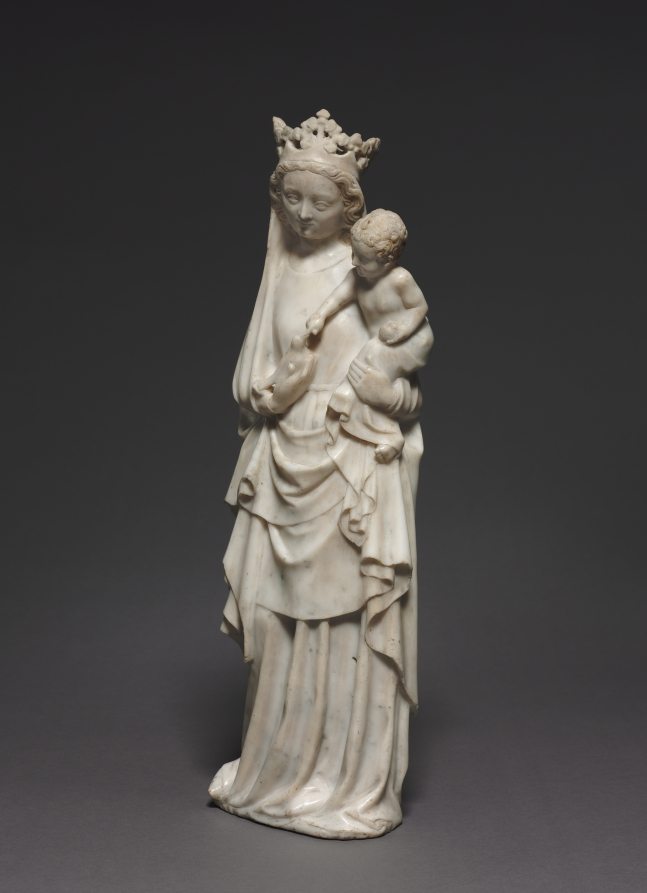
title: Virgin and Child with a Bird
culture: France, Île-de-France, Paris, 14th century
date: c. 1350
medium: marble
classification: Sculpture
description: The Virgin and Child represents one of the most frequent subjects for free-standing sculpture in 14th-century France, motivated by the developing cult of the Virgin and increasing veneration of Mary. Such sculptures were not restricted to churches, but were also found in roadside shrines, entrances to towns, and domestic use in private chapels. The small scale of this statuette suggests it was made for private veneration. The bird, held in the Virgin’s right hand, was a well-known symbol of the human soul and represents Christ’s role as redeemer of humankind.